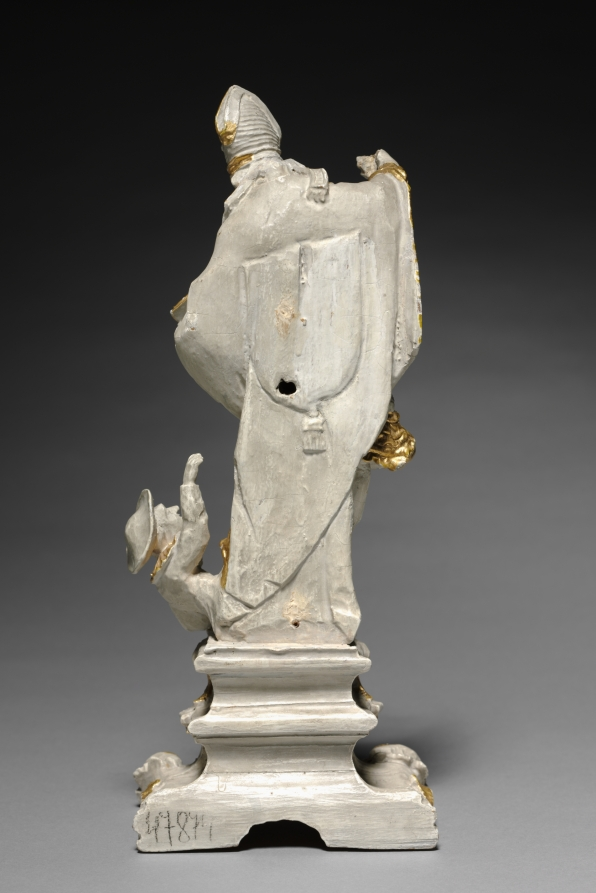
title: Bishop Saint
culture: Germany, 18th century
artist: attributed to Ferdinand Tietz (Austrian, 1708–1777)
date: c. 1740–1750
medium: painted and gilded wood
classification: Sculpture